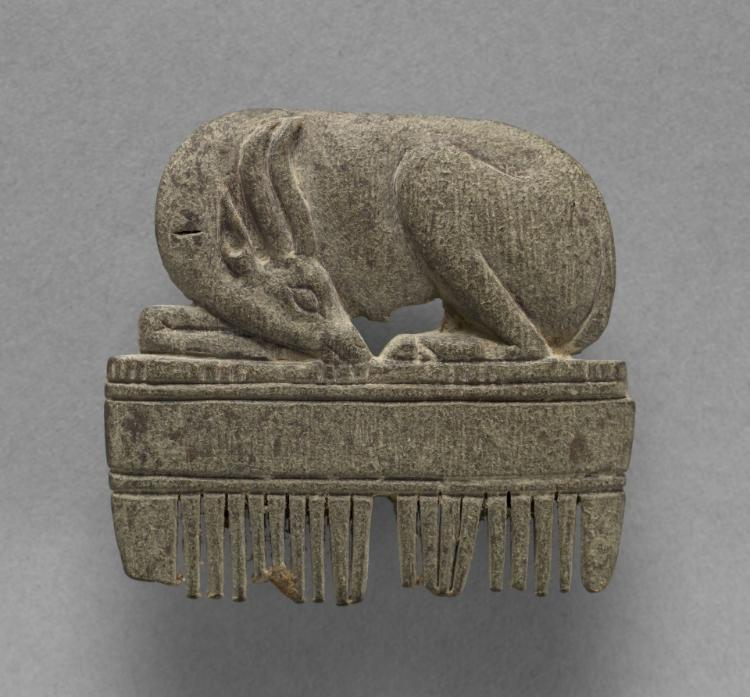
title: Comb with Gazelle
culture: Egypt, New Kingdom (1540–1069 BCE), Dynasty 18, reign of Amenhotep III (1390–1352 BCE)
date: c. 1391–1353 BCE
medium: wood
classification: Cosmetic Objects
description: Both ancient Egyptian men and women loved cosmetics. Unguents, oils, and perfumes made from aromatic plant resins and gums were obtained at great cost from distant lands. The objects identified with cosmetics were given lavish treatment. The luxurious obsidian and gold beaker hints at the precious contents it once held. Others are fanciful in form, such as an ostrich egg. The god Bes, patron god of cosmetics, himself is the subject of a colorful jar. The delicately carved human face and the head of a giraffe decorated elaborate ivory cosmetic spoons.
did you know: This ivory comb was likely a treasured cosmetic object.